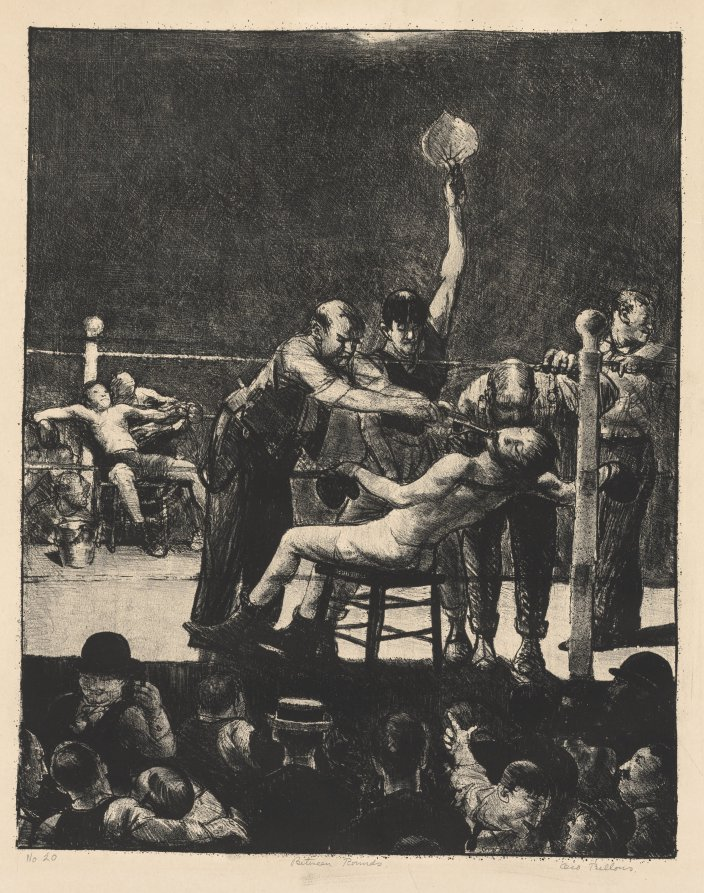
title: Between Rounds, Small, Second Stone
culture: America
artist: George Bellows (American, 1882–1925)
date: 1923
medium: lithograph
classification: Print